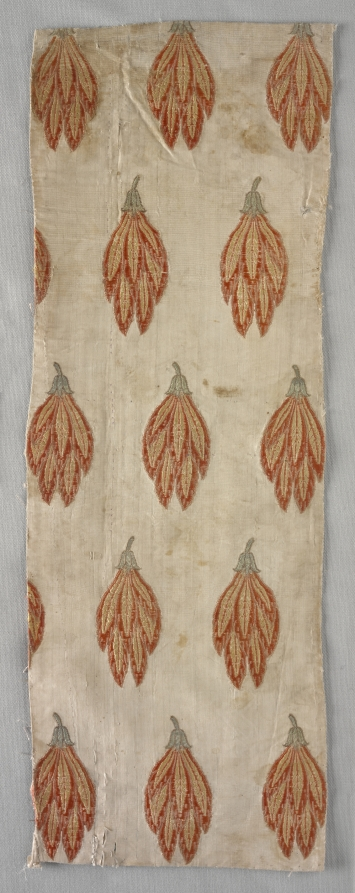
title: Fragment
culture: Iran, 18th century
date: 1700s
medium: brocade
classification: Textile